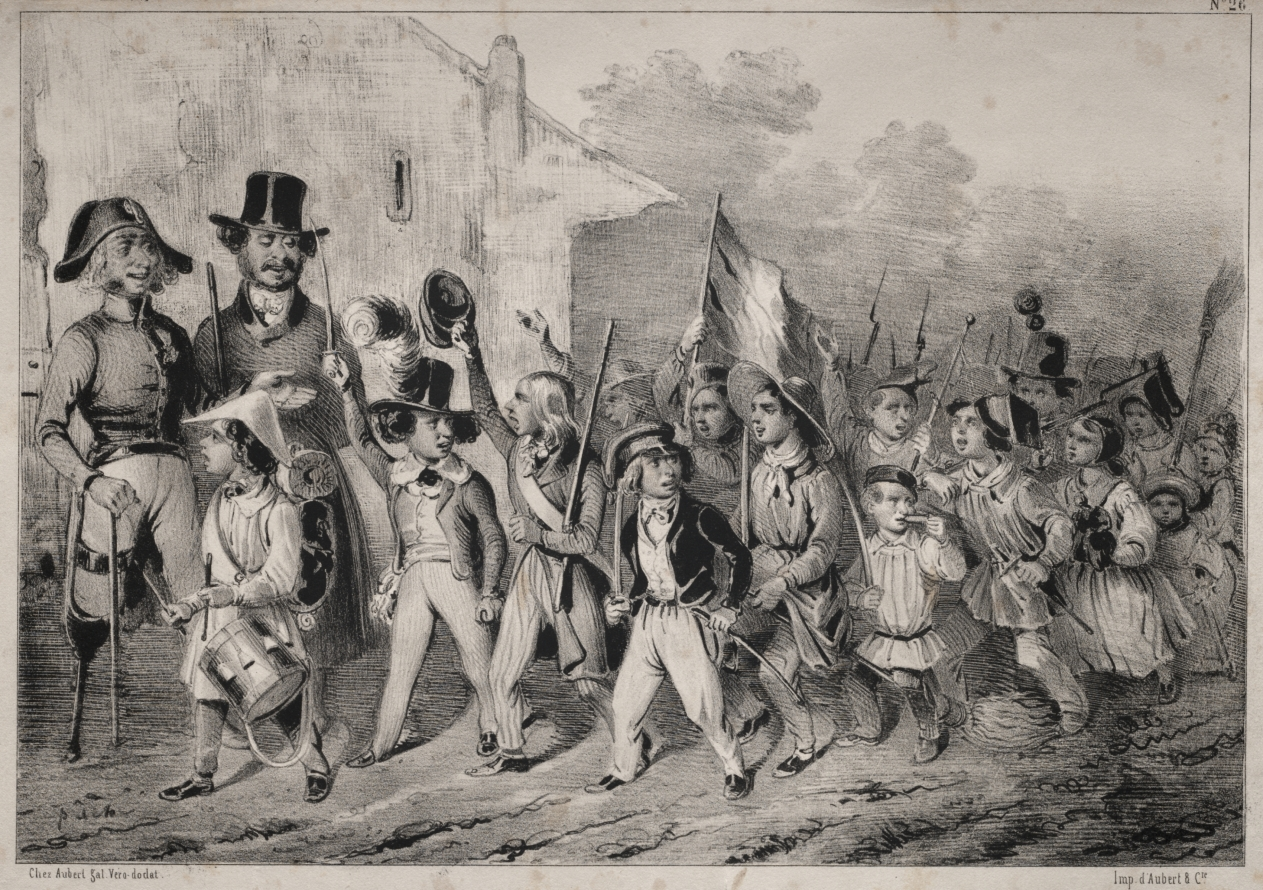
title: Actualités: Bon! Les moutards en veulent sussi! quand on parle de guerre! comme toute ca prend feu! ... On voit que c'est de la plante indigène!... ca promet!!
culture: France, 19th century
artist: Clémente Pruche (French, 1831–1870)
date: 1840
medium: lithograph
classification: Print